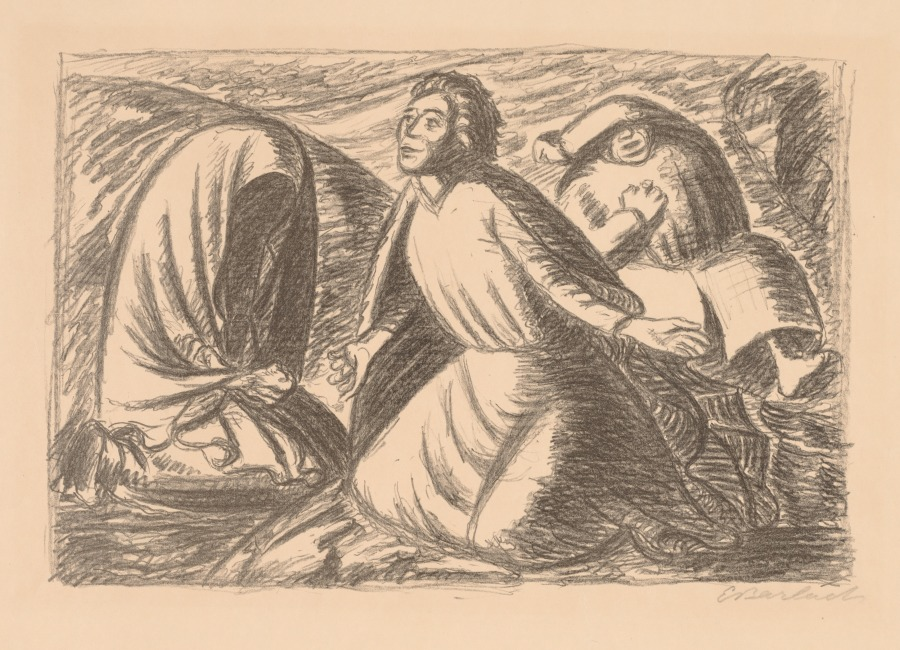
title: Hope and Despair II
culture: Germany, 20th century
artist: Ernst Barlach (German, 1870–1938)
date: 1931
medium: lithograph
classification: Print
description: In both his sculpture and prints, Barlach expressed the suffering and anguish of World War I (1914-18) and the difficult years that followed. The artist, whose work depicts ordinary workers, wrote: "Truly, not beauty and loveliness is our strength, our power, but rather the opposite, ugliness, daemonic passion and the grotesque genius of greatness..."